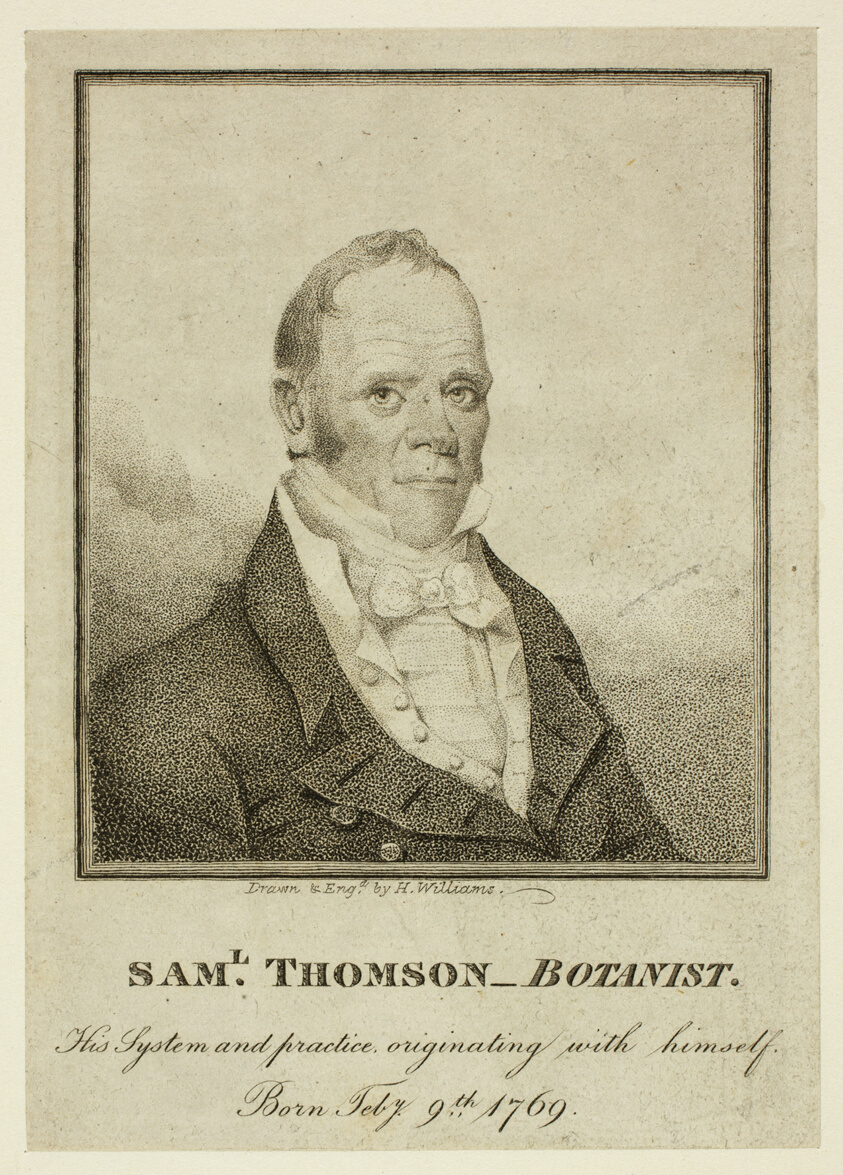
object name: Print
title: Sam'l. Thomson, Botanist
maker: Henry Williams (American, 1787-1830)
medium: Engraving and stipple on cream wove paper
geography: United States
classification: engraving; print; prints and drawing